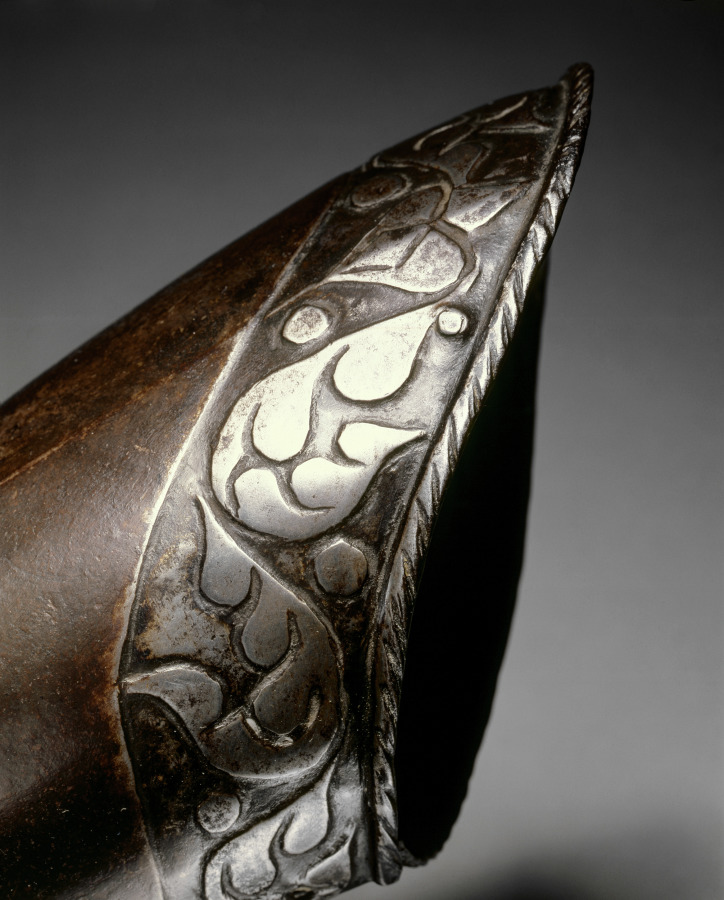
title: Black and White Elbow Gauntlet for the Right Hand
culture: North Germany, 16th century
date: c.1570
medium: steel, blackened with leather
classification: Arms and Armor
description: Plate armor alternately decorated with brightly polished ("white") and darkened ("black") surface areas is commonly referred to as "black and white" armor. The black color results from painting the surface areas, or merely leaving them dark from the forging process. The gauntlet here has been further embellished with an embossed cuff. The 1500s saw the revival of this ancient technique also known as repoussé. First the pattern is drawn onto the surface and then hammered and punched from the inside to gradually shape the desired raised design on the outer surface of the metal. This technique was reserved for only the costliest of armors.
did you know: To throw a gauntlet or armored glove at the feet of your enemy or opponent was a grave insult, one only to be matched with personal combat. This is where we get the modern phrase "throw down the gauntlet."